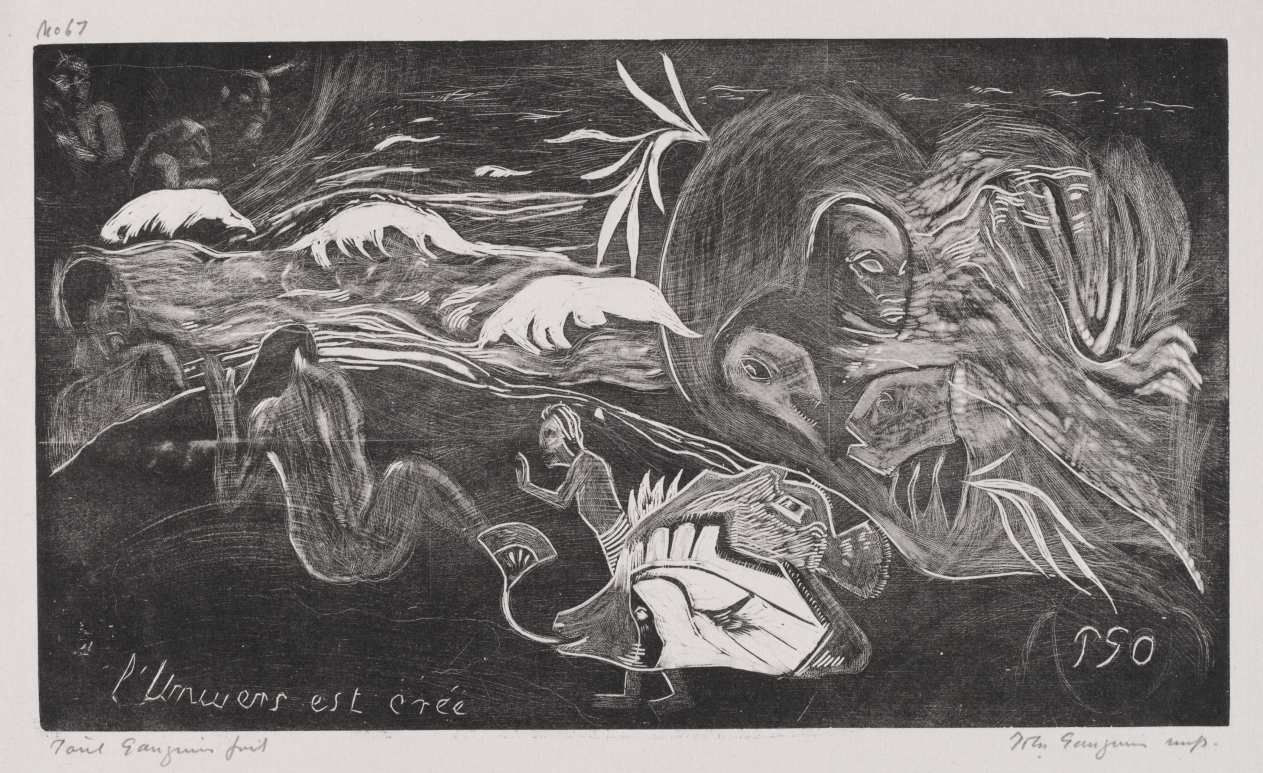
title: Noa Noa: L'Univers est créé (The Universe is Created)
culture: France, 19th century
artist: Paul Gauguin (French, 1848–1903)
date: 1893–94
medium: woodcut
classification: Print